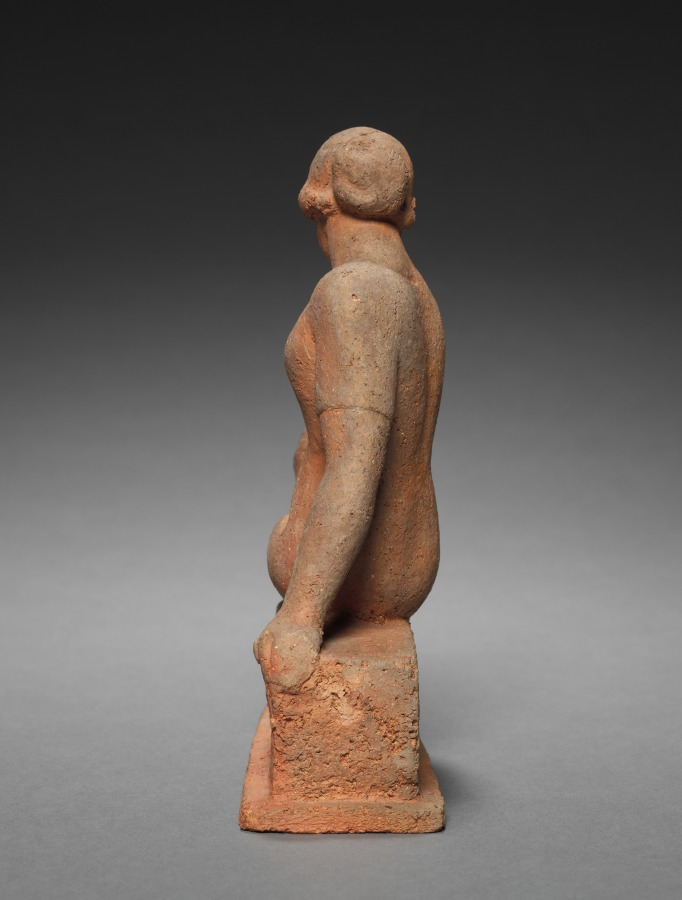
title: Seated Woman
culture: France, 20th century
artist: Aristide Maillol (French, 1861–1944)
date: c. 1900 – 1944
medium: terracotta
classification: Sculpture